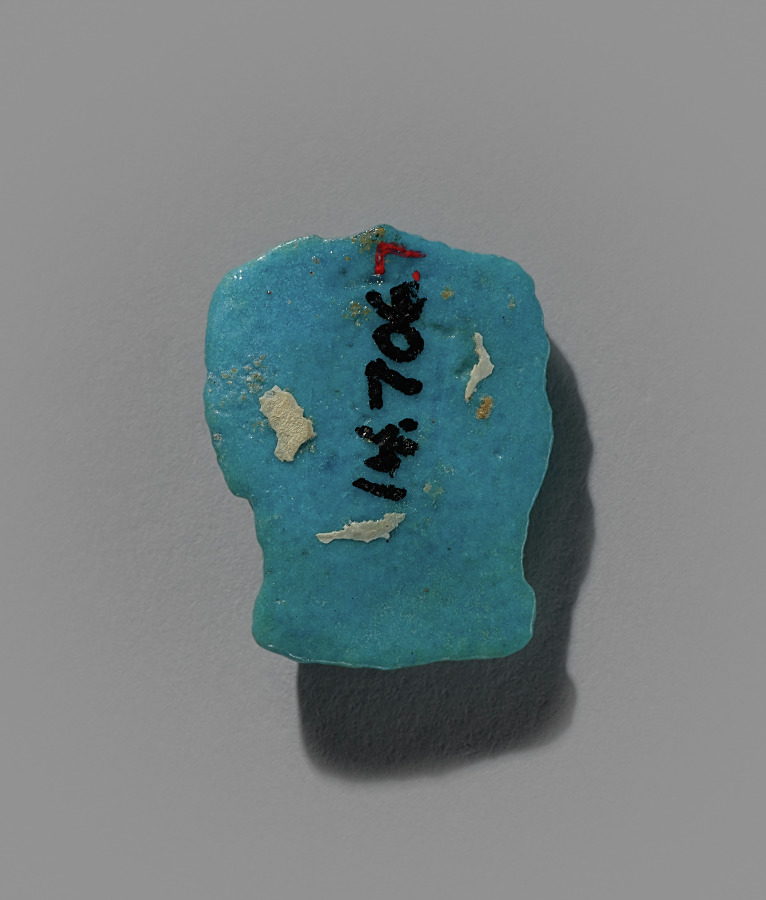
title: Food Model Amulet: Brace of Duck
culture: Egypt, New Kingdom (1540–1069 BCE), Dynasties 19–20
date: 1295–1069 BCE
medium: turquoise faience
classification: Amulets